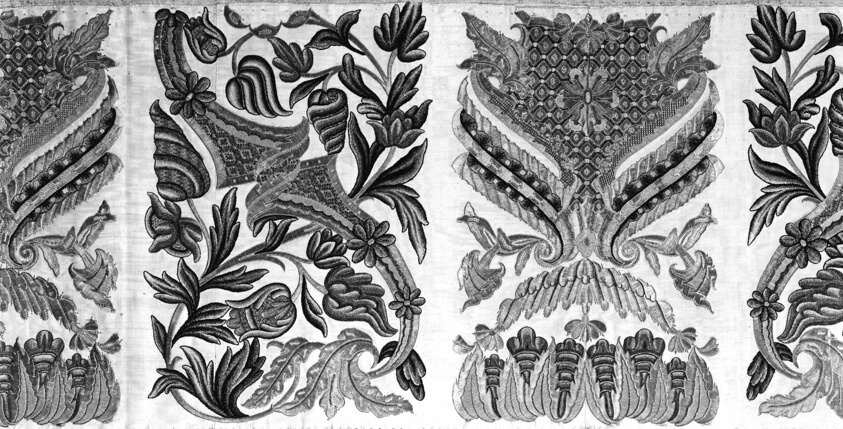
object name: Textile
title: Panel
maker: Italy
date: 1675/1725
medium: Silk, weft ribbed plain weave with supplementary facing weft of gilt metal strips; embroidered in silk chenille, silk, linen, and gilt metal strip wrapped silk in couching and padded couching; four panels joined; backed with linen, plain weave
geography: Italy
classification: textile; weaving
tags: flowers, foliage